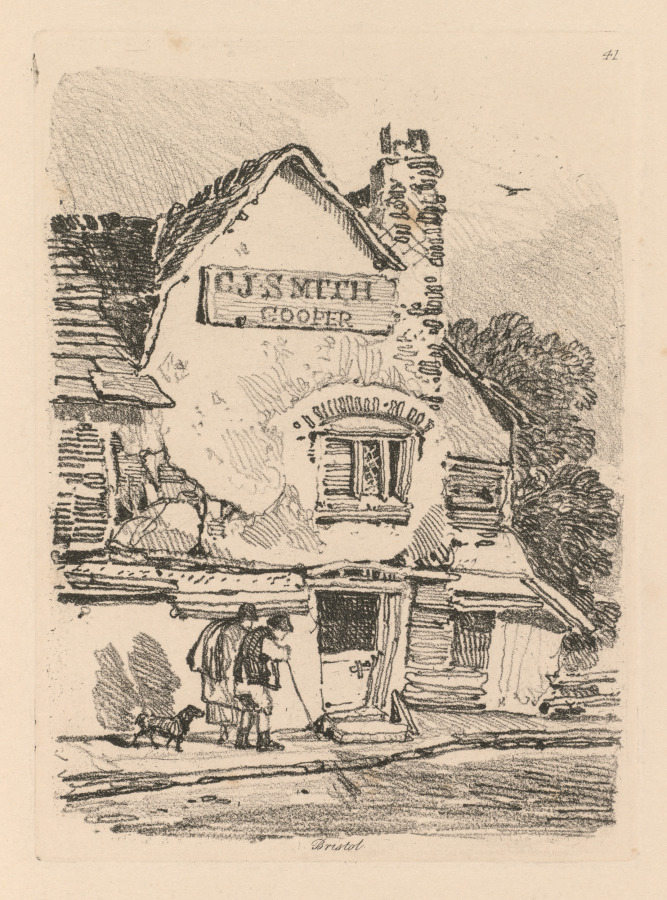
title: Liber Studiorum: Plate 41, House at Bristol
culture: England, 19th century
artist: John Sell Cotman (British, 1782–1842)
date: 1838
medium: softground etching, from a bound volume containing 48 plates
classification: Bound Volume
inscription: In plate, within image, upper right: 41; in plate, below image: Bristol